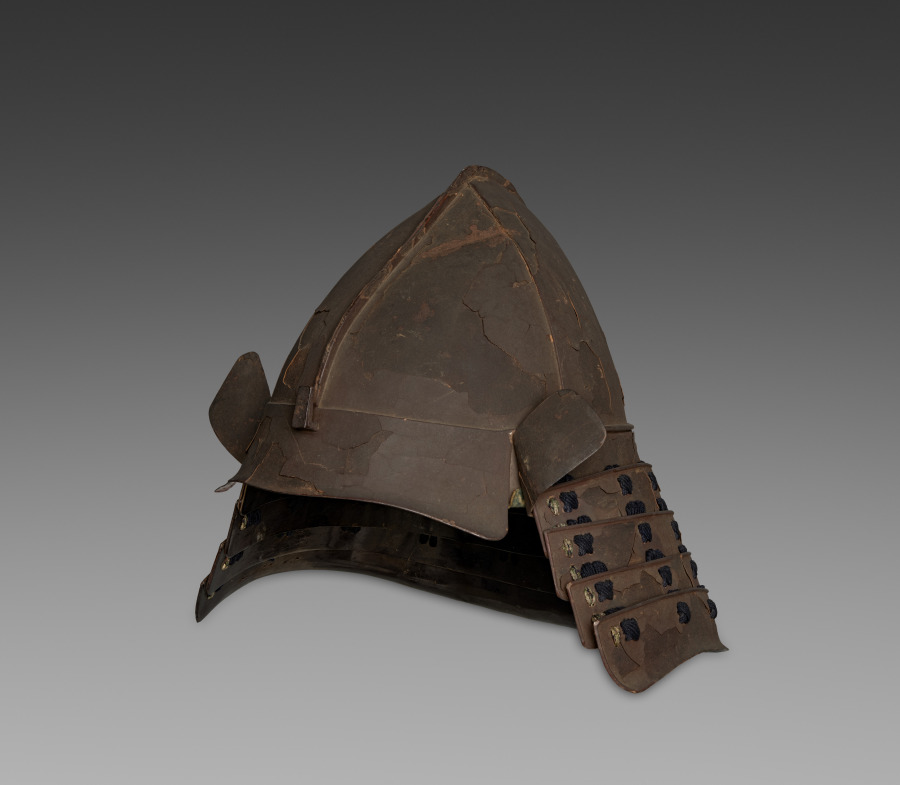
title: Helmet (Kabuto)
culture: Japan, Edo period (1615–1868)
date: 1615–1868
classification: Arms and Armor